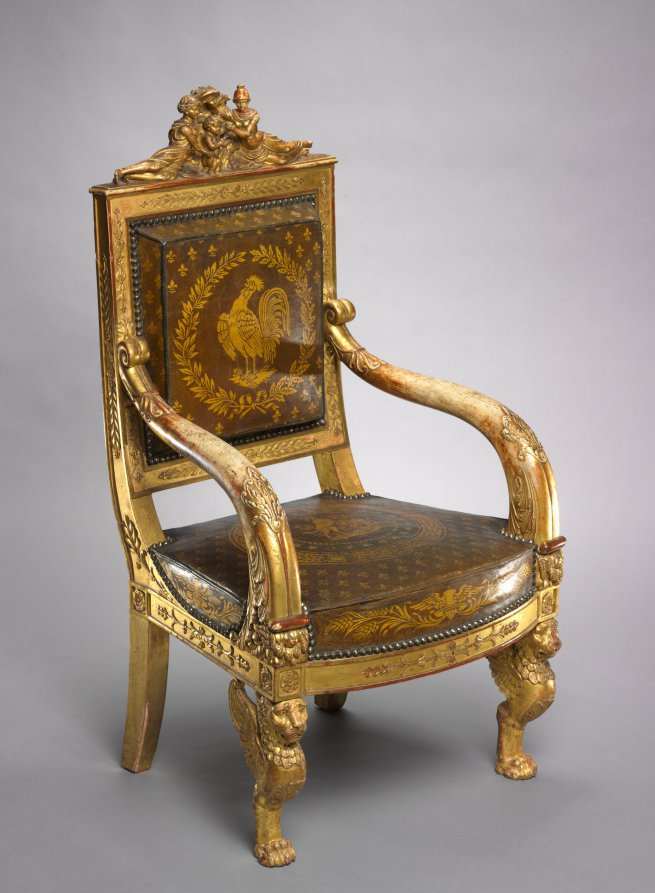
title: Child's Throne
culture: France, Paris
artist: Pierre-Marie Balny le Jeune (French, 1832)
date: 1822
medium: carved and gilded wood, leather upholstery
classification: Furniture and woodwork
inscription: inscribed with stencils inside back rail: BLONDEL TAPISSIER/RUE ST. ANTOINE N 72 1822 inscribed in ink lower edge back rail: 12 JANVIER 18[22?]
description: This chair was made for the young, presumed successor to the French throne who ruled briefly as Henri V in 1830, the last of the direct Bourbon line. He is depicted at the center of the top rail protected by female figures representing France and Minerva, the Roman goddess of wisdom. Fleurs-de-lis and the Gallic rooster, symbols of French royalty and the French people, decorate the upholstery.